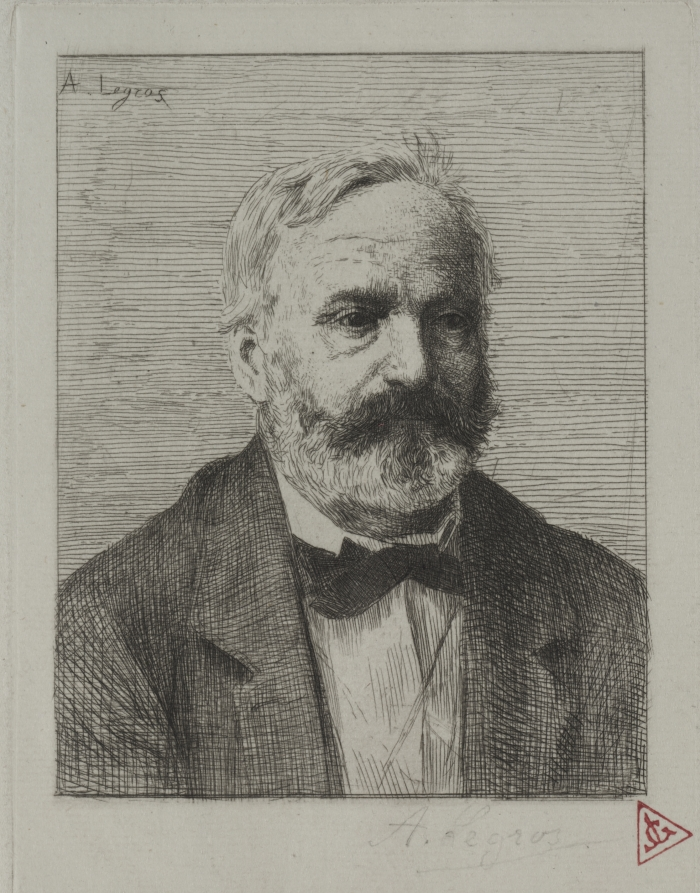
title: Victor Hugo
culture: France, 19th century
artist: Alphonse Legros (French, 1837–1911)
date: c. 1857–1911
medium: etching and drypoint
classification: Print